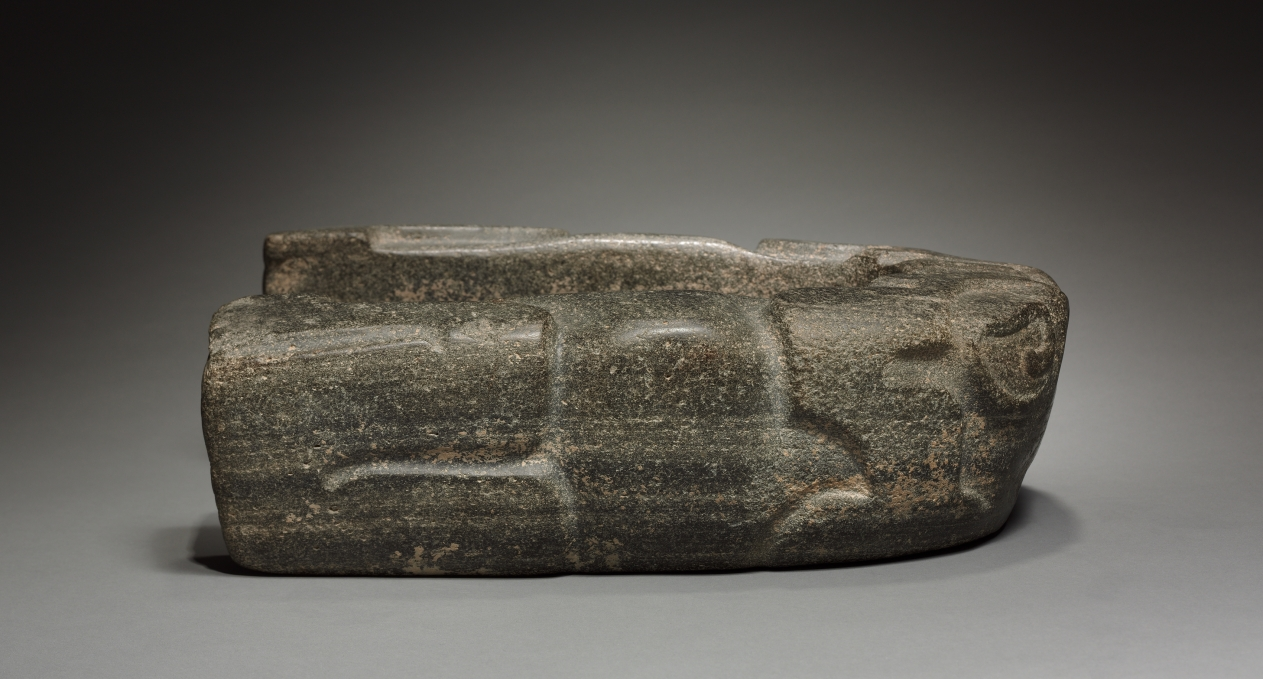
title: Unfinished Yoke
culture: Mexico, Central Veracruz, Classsic Veracruz style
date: 600–900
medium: gray stone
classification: Sculpture